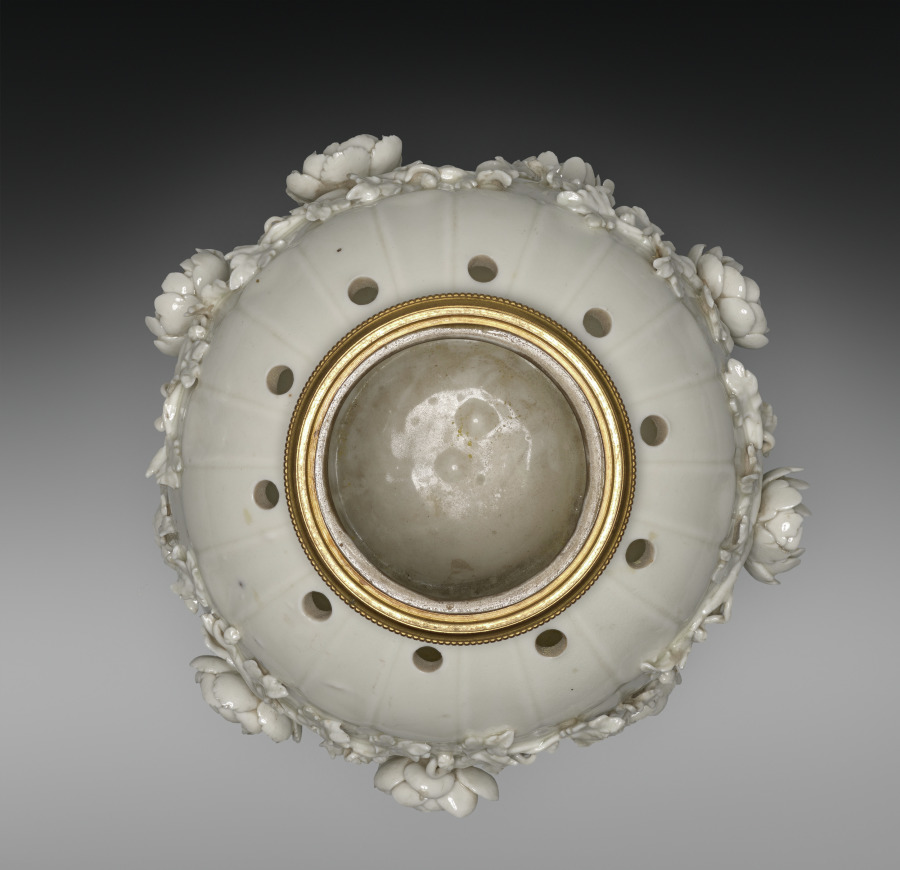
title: Potpourri Vase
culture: France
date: 1860–80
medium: blanc-de-chine porcelain; gilt bronze mount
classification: Ceramic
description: This vase--part of a pair of covered vases--was created to contain potpourri, a mixture of flowers, herbs, and spices emitting ambient fragrance. This specific function offered a particularly fertile ground for the development of French porcelain from the mid-1700s, as manufactories experimented with forms, surface ornamentations, and placement of perforations. Produced by the firm of Edmé Samson in the 1800s, the vases pay homage to this history. While using updated technique and material, as well as more exuberant decorations, these vases draw upon designs by earlier innovators such as the Saint-Cloud manufactory.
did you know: Potpourri vases always have holes in the top to let the scent of dried spices and flowers contained within freshen the air around them.